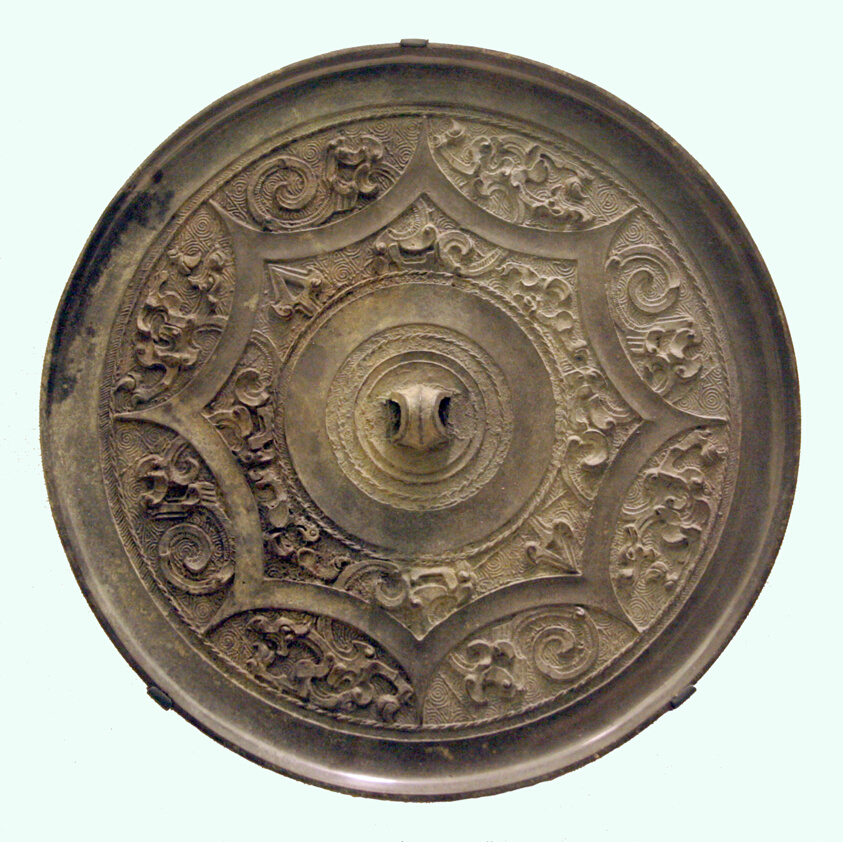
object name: Decorative Arts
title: Mirror with Dragon and Bird Arabesque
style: Chinese (culture or style)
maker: China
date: Western Han dynasty (206 B.C.–A.D. 9)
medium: Bronze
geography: China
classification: bronze; metal; mirror; asian art; decorative arts